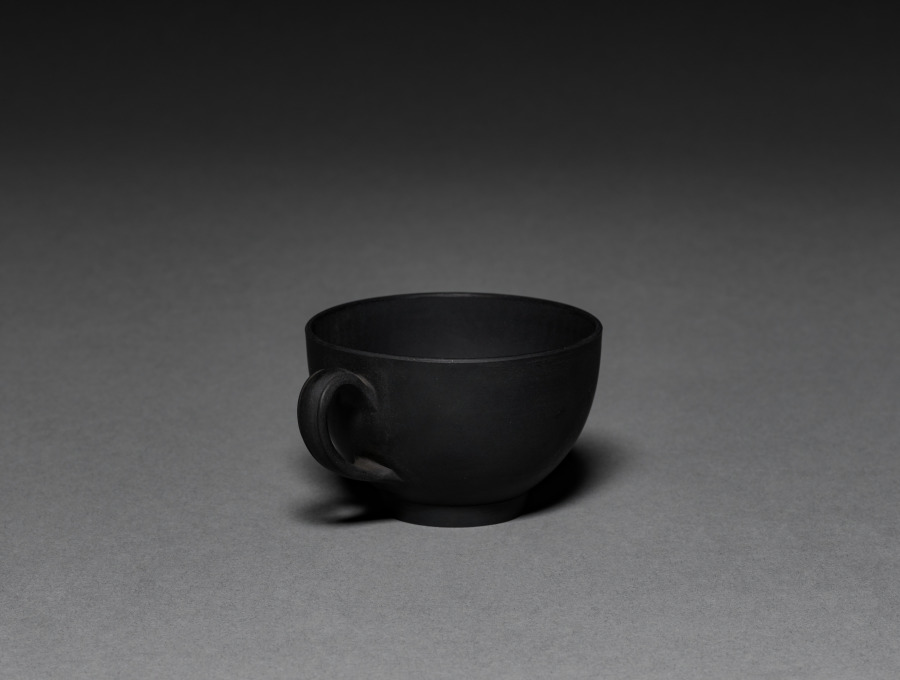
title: Cup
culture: England, Staffordshire, late 18th century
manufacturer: Wedgwood Factory (British)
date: late 1700s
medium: pottery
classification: Ceramic